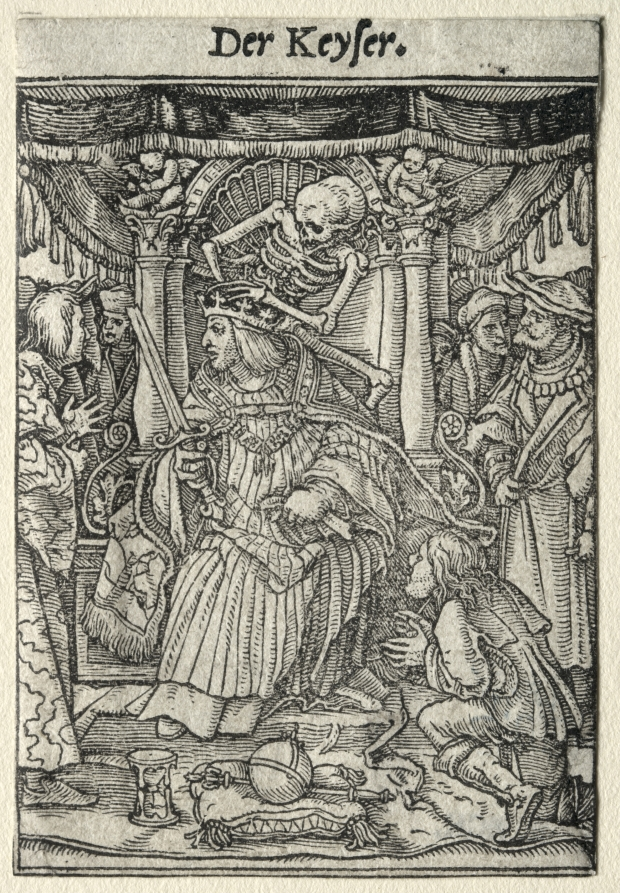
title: Dance of Death: The Emperor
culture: Germany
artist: Hans Holbein the Younger (German, active England and Switzerland, 1497/98–1543)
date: c. 1526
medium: woodcut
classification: Print